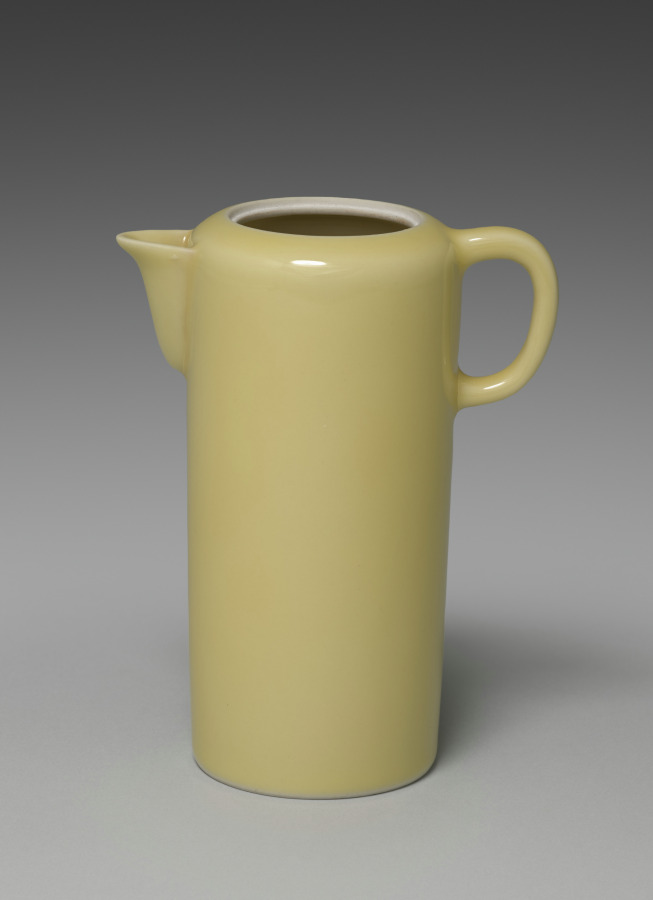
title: Sake Pourer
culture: Japan, Taishō period (1912–26) or Shōwa period (1926–89)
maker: Seifū Yohei IV (Japanese, 1872–1951)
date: 1914–46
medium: Porcelain with yellow glaze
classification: Ceramic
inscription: 清風造 。 【印】 清風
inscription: 成山清風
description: Like his father, Yohei IV also produced works with red or yellow monochrome glazes. His yellow-glazed works include this pair of sake pourers, a set of five drinking cups CMA 2022.217, and a sweets bowl molded into the shape of a chrysanthemum CMA 2022.218.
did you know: The lid's handle is made of bamboo.